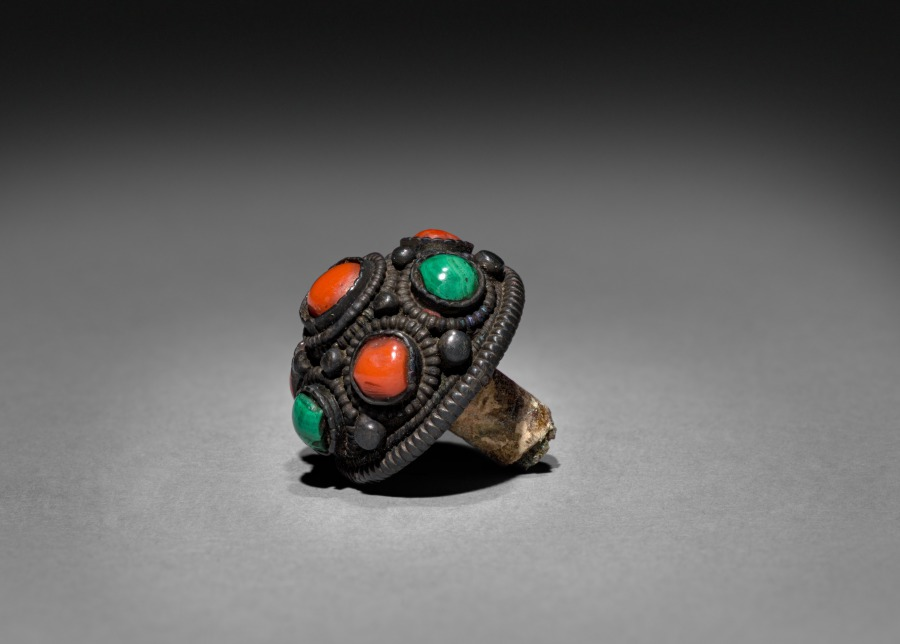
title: Snuff Bottle (stopper)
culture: China, Qing dynasty (1644-1911)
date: 1644–1911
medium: glass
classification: Glass